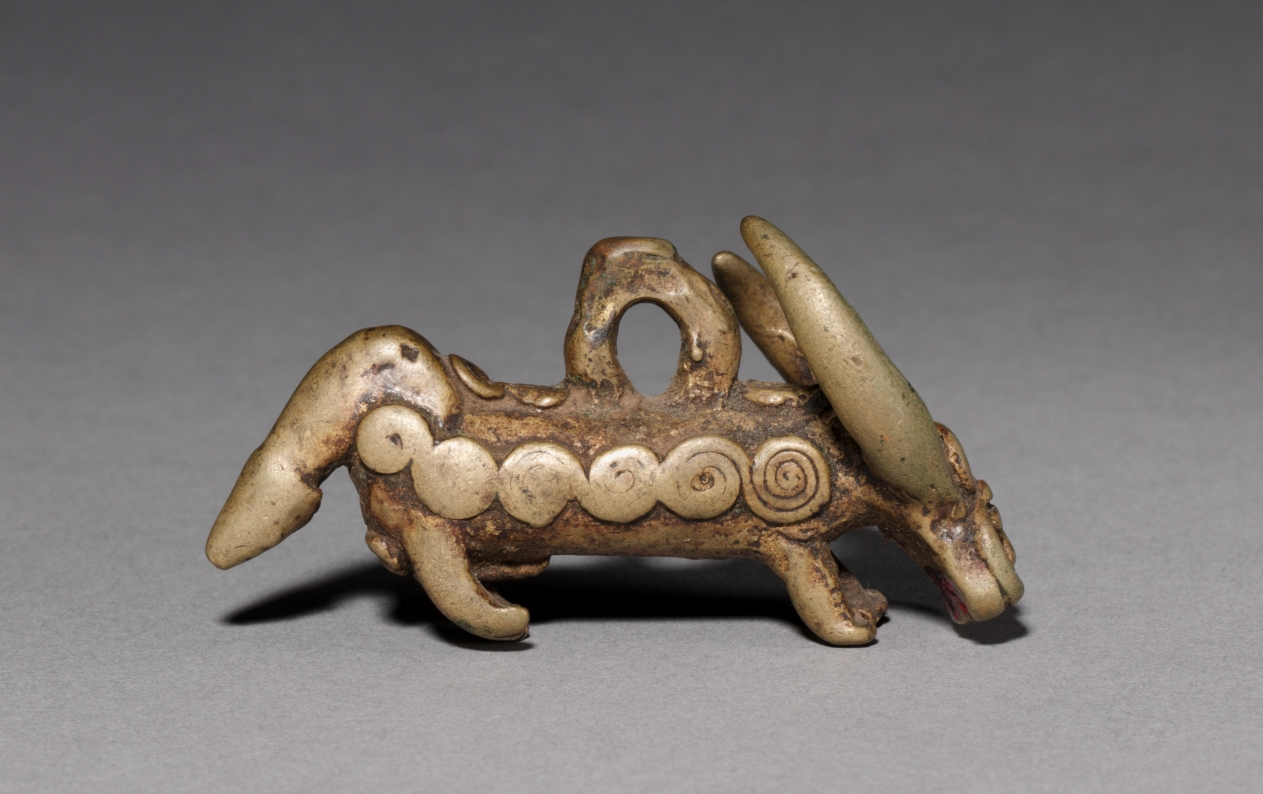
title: Animal Pendant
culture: Western Sudan, Burkina Faso, Tusyan, 20th century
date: 1900s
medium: Copper alloy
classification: Jewelry